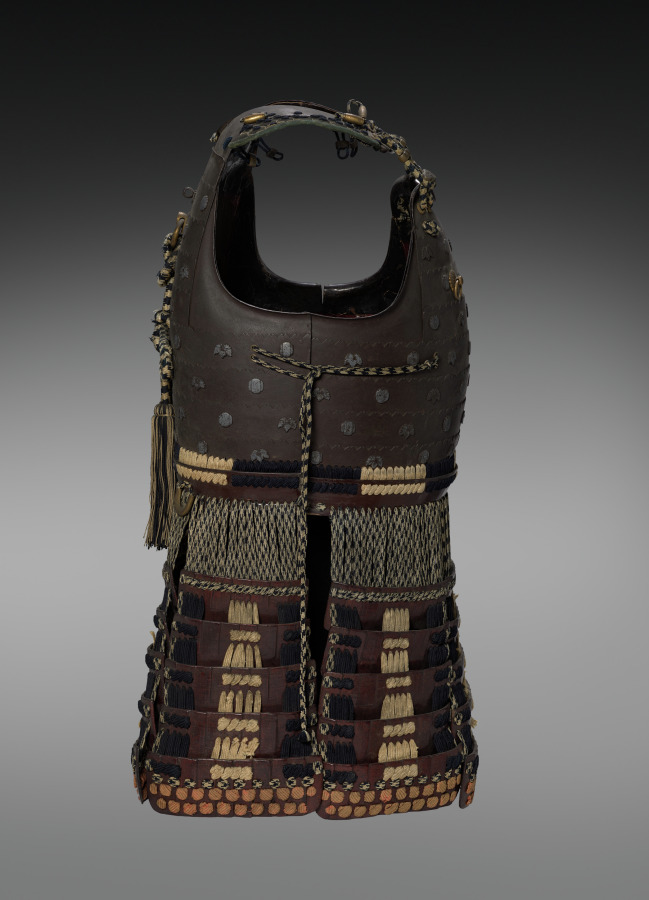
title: Chest Armor (Cuirass; Dō) and Fauld (Kusazuri)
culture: Japan, Edo period (1615–1868)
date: 1600s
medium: Iron, lacquer, textile (silk)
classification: Arms and Armor